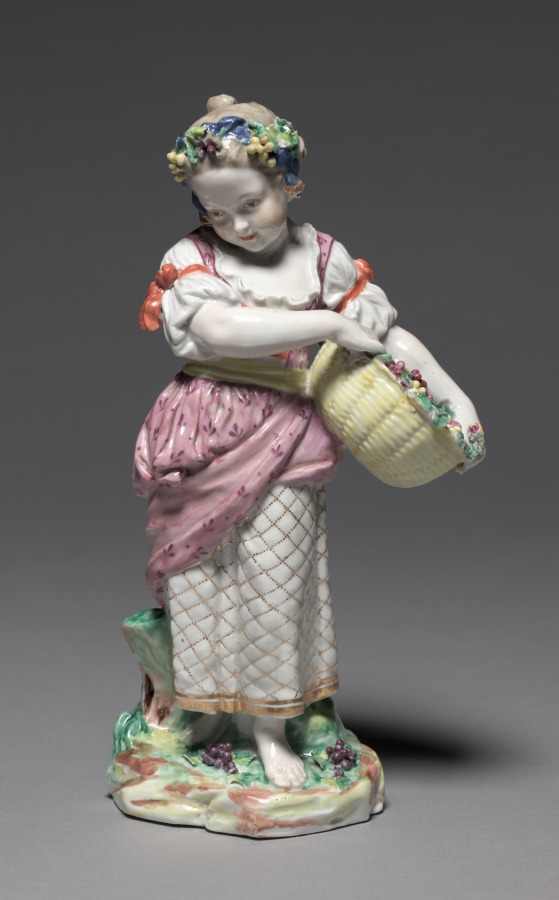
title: Figures Depicting the Four Seasons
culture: England, Bristol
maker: Bristol Porcelain Factory (British, 1770–81)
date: c. 1775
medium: hard-paste porcelain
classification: Ceramic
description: In this group depicting the four seasons, a young boy in ice skates represents winter; a young lady adorns her hair with flowers in spring; a young man guards his beehive in summer; and a girl gathers fruit in autumn.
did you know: Allegorical figures most often decorated a table during the dessert course, providing amusing subjects for conversation.